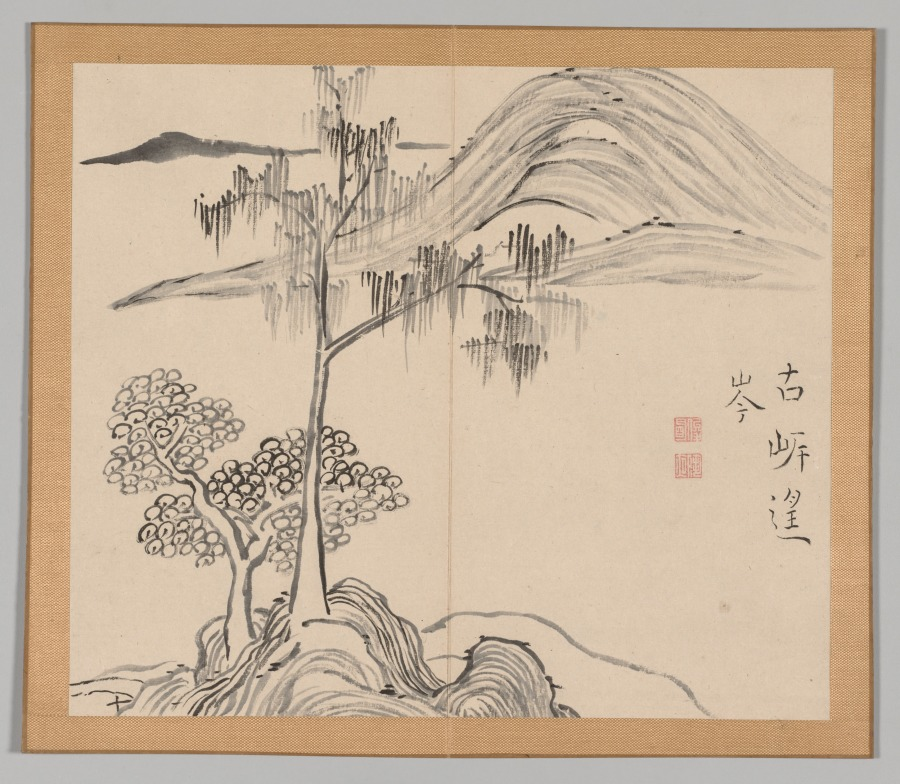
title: Reverberations of Taiga, Volume 1 (leaf 36)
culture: Japan, Edo period (1615–1868)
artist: Aoki Shukuya (Japanese, d. 1802)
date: mid- to late 1700s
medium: double-leaf from a pair of albums; ink and light color on paper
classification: Portfolio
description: Traditionally, young painters in Japan began their studies with an established master-painter. The master's compositions invariably became models that the apprentice copied to learn various ink and brush techniques. Shukuya was a pupil of the famous Kyoto artist Ikeno Taiga, whose style is reflected in these sketches of rocks, trees, and mountains.